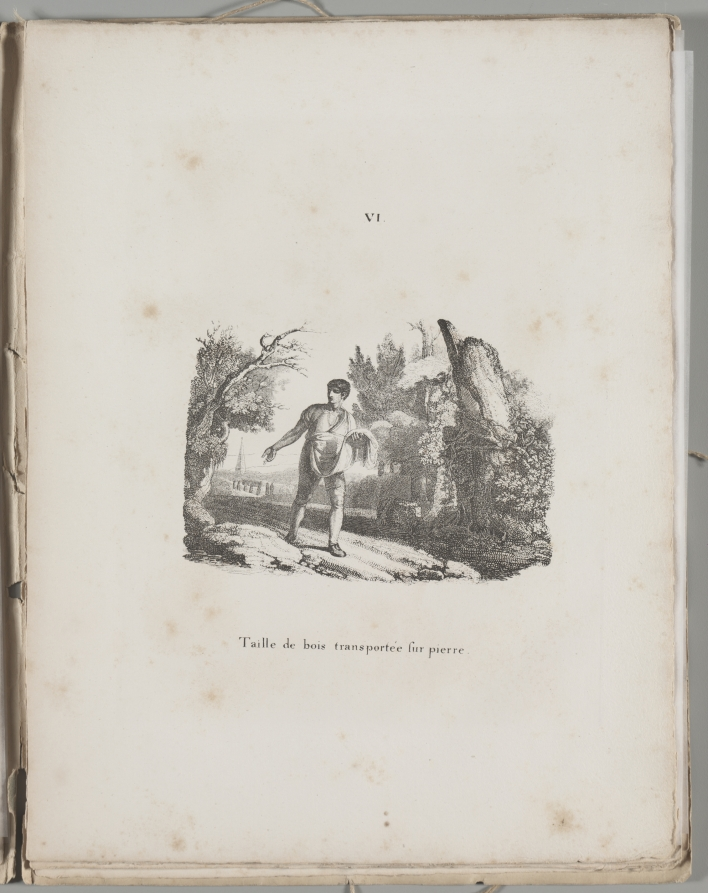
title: Art of the Lithograph: Transfer of a Wood Engraving, Plate VI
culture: Germany, 19th century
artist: Alois Senefelder (German, 1771–1834)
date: 1819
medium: lithograph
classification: Portfolio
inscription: On plate: Taille de bois transportée sur Pierre